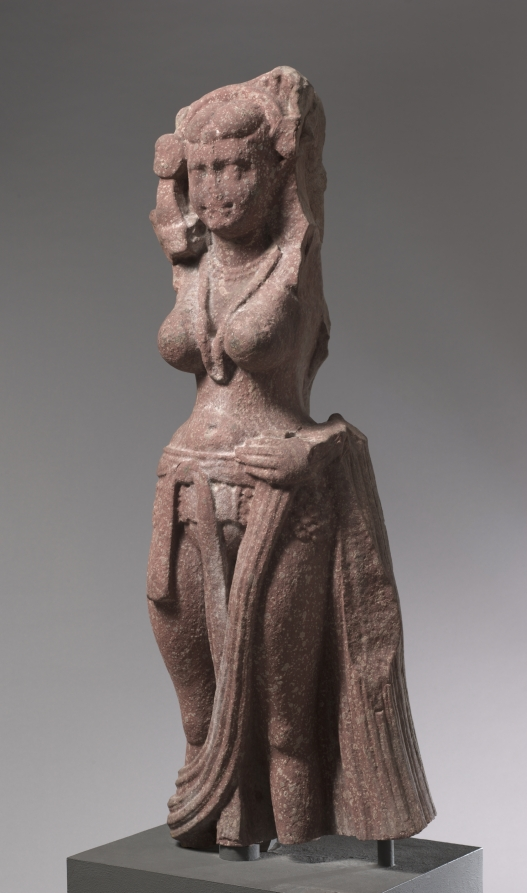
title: Nature Divinity (Yakshi)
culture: India, Mathura, Kshatrapa period (c. 20 BCE–114 CE)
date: c. 75 CE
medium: mottled red sandstone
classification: Sculpture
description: This powerful figure personifies the ideal of the young mother in the form of a nature goddess associated with birth and nourishment. Her iconic stance with the weight equally distributed on both feet indicates that this statue was an object of worship. Her extraordinary headdress, well preserved in the back, and full complement of jewels and ornaments, point to the idea of wealth, which leads to prosperity.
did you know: The prominence of the peacock (enemy of serpents) on the back of her headdress suggests she has the power to protect against snakebite.